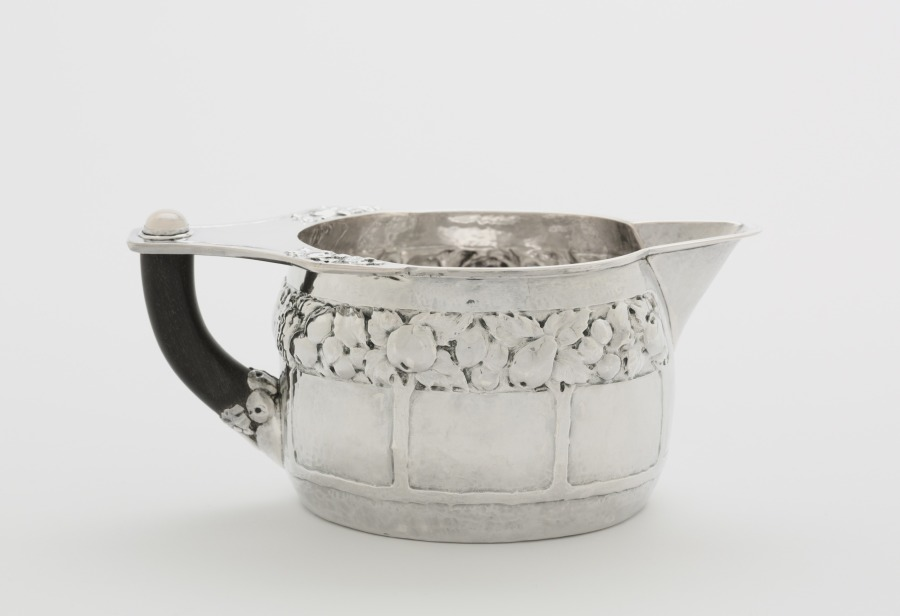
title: Creamer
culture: America, Ohio, Cleveland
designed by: Louis Rorimer (American, 1872–1939)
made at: and Rokesley Shop (American)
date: c. 1910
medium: silver, moonstones, ebony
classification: Silver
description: This tea and coffee service was designed for production by the Rokesley Shop, a collaborative group working at Louis Rorimer’s studio. Reacting against industrial mass production, Rorimer emphasized inventive design in finely crafted objects.